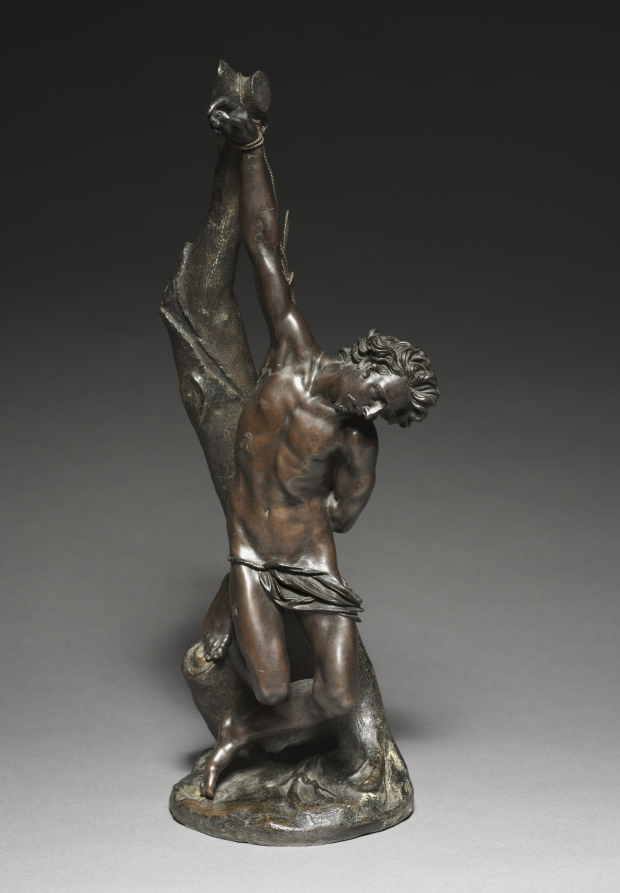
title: Saint Sebastian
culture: Germany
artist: cast after a model probably by Georg Petel (German, c. 1601-c. 1634)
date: 1620s or later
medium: bronze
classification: Sculpture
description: This composition is the subject of an ongoing attribution debate. The design is adapted from a painting by Adam Elsheimer, a German artist working Rome. This sculptural model exists in many versions; however, they vary considerably in their execution, complicating the identification, because they were clearly not made by a single sculptor or workshop. However, Georg Petel probably first created the design as he traveled across Italy in 1620–24, where his portrait was painted holding this composition.